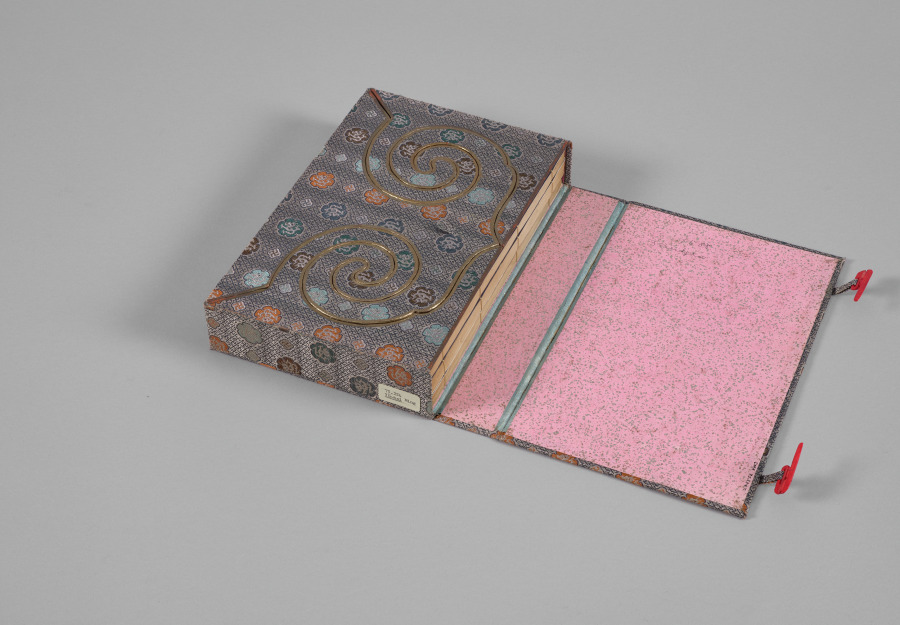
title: Yu-hai (Ocean of Jade) woodblock bound volume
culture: China, Ming dynasty (1368–1644)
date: 1368–1644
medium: woodblock-printed book with painted edges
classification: Bound Volume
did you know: When each book is rolled to form a cylinder, a landscape appears on the edges, painted in ink and washes of color.